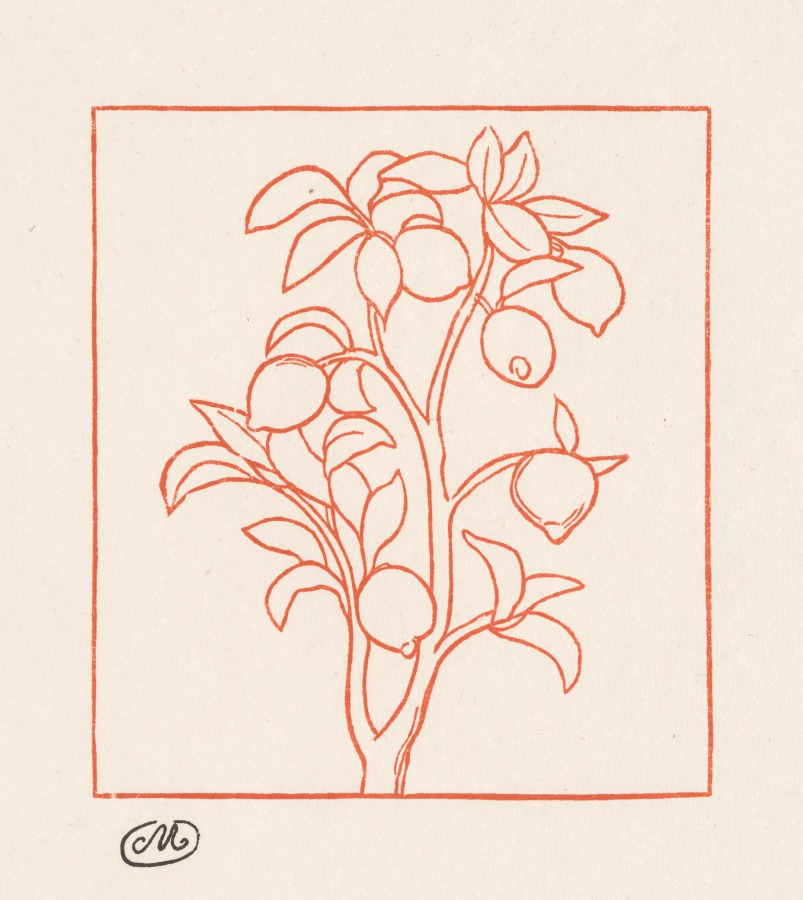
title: The Georgics: Lemon Tree (Les Géorgiques: Citronnier)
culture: France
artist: Aristide Maillol (French, 1861–1944)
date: 1937–43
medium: color woodcut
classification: Print